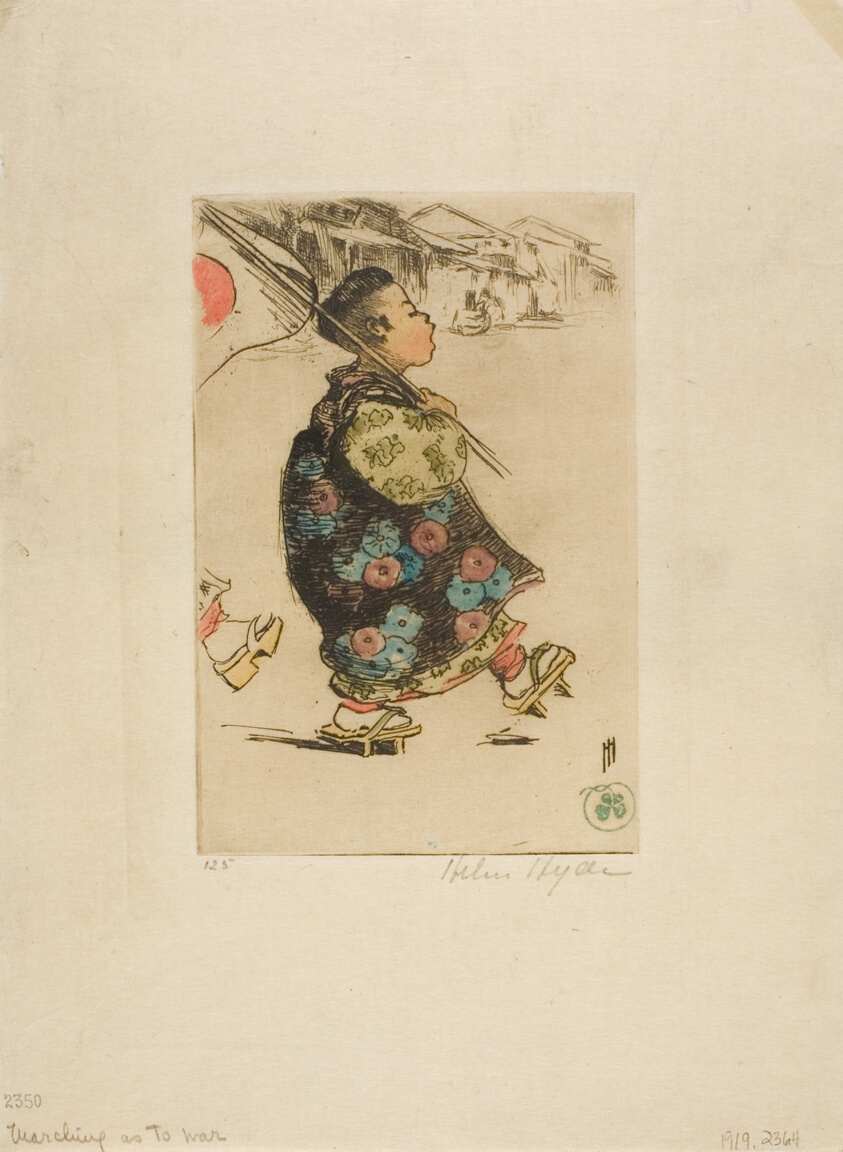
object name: Print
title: Marching as to War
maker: Helen Hyde (American, 1868-1919)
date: 1904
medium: Color etching on paper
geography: United States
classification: woodcut; print; prints and drawing